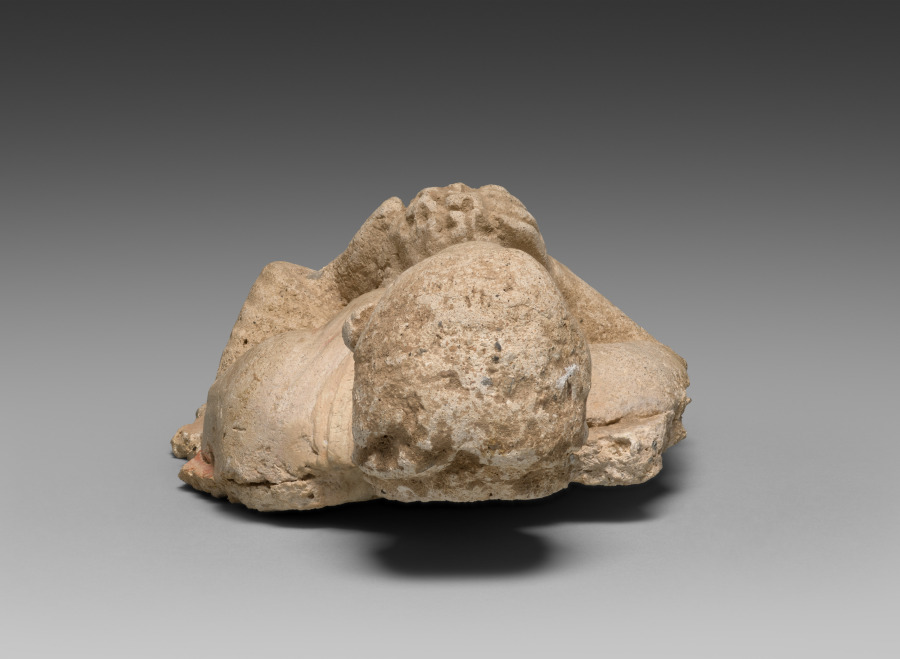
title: Monk bearing offerings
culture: Afghanistan, Hadda, probably Tape Shotor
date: c. 300 CE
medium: stucco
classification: Sculpture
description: This Buddhist monk wears a robe over one shoulder, and his hair has been shaved. He reverently brings offerings of fruit or flowers to the Buddha. Triads depicting the Buddha with attendants bringing offerings were set up on the base of monuments called stupas, in niches defined by pilasters with Corinthian-style columns indicative of the region's Hellenistic heritage.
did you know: This sculpture came from a monastery famous for preserving pieces of the Buddha's skull and robe.